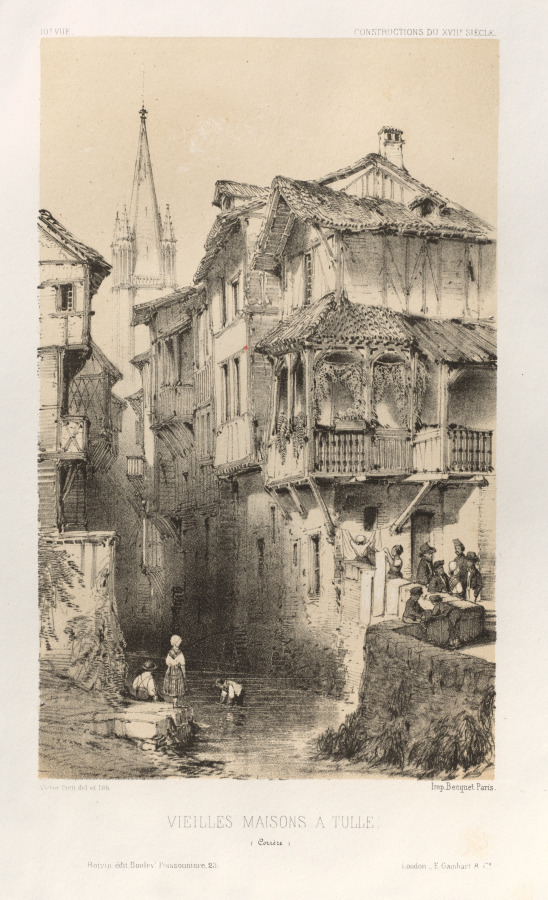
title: Architecture Pittoresque ou Monuments des xveme. Et xvieme. Siecles: Chateaux De France des XV et XVI Siecles: Pl. 10, Vielles Maisons A Tulle (Correze)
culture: France, 19th century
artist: Victor Petit (French, 1817–1874)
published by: Charles Boivin (publisher and editor); Lith de Godard a Paris (printer)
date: 1860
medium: lithograph with tint stone, from portfolio of 100 lithographs with tint stone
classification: Print